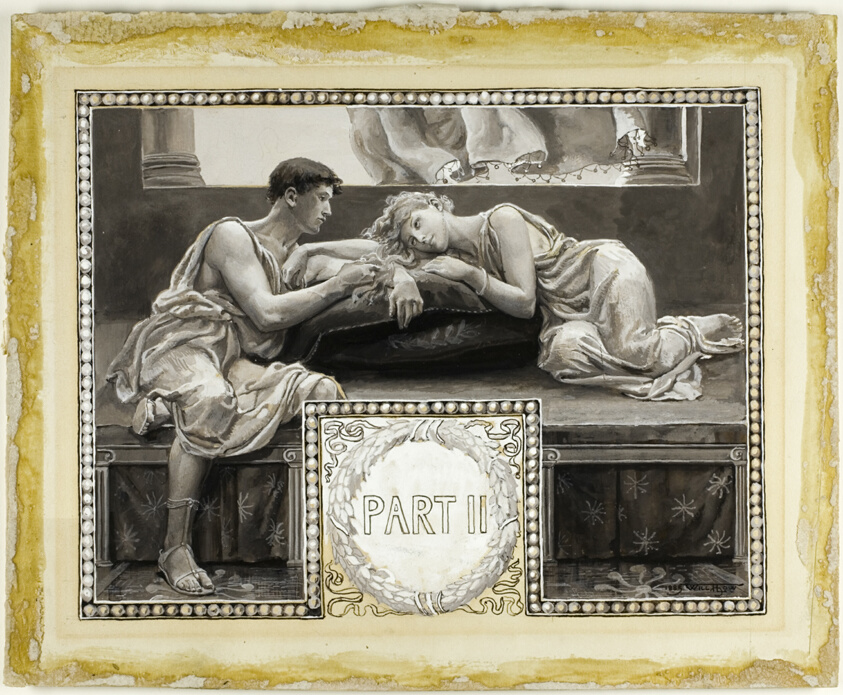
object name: Drawing and Watercolor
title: They Were Enthroned, in the Eventide, Upon a Couch - Head-Piece, Part II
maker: Will Hicock Low (American, 1853-1932)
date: 1885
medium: Brown, gray and white gouache, over traces of graphite, on cream wood-pulp laminate board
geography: United States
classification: drawings (visual works); prints and drawing